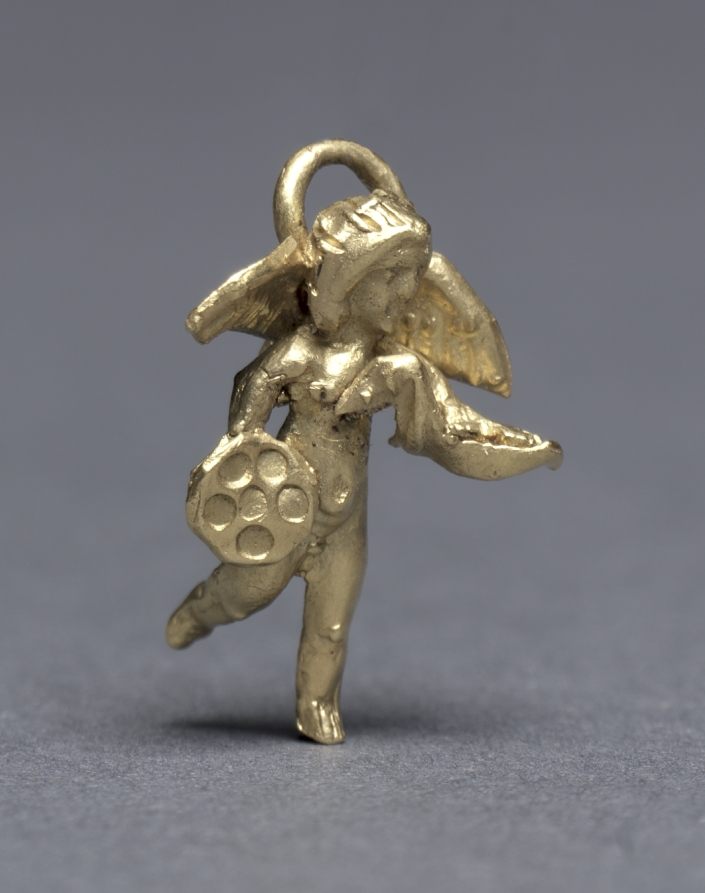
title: Pendant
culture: Greece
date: 323–31 BCE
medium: gold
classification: Jewelry